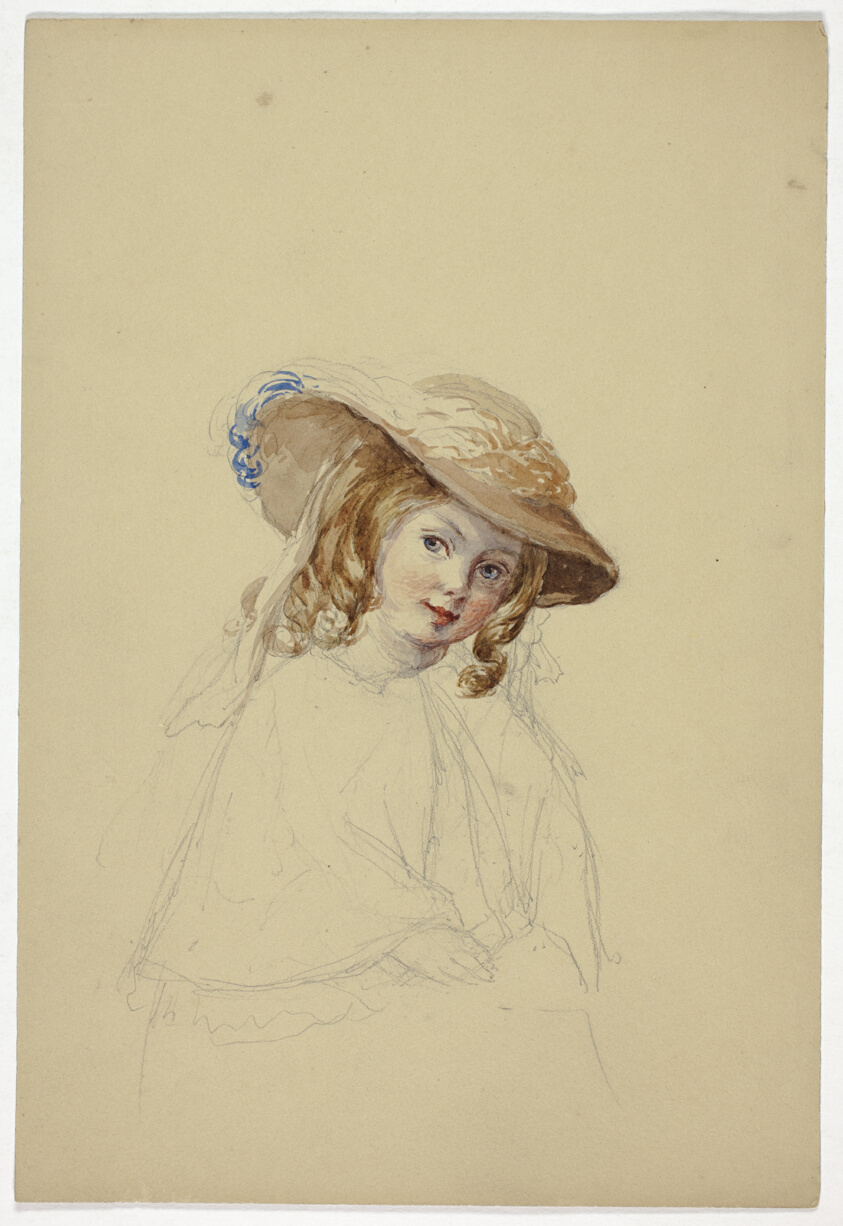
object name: Drawing and Watercolor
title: Portrait of Florence Seymour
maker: Elizabeth Murray (English, c. 1815-1882)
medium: Watercolor over graphite on brown wove paper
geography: England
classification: watercolor; drawings (visual works); prints and drawing